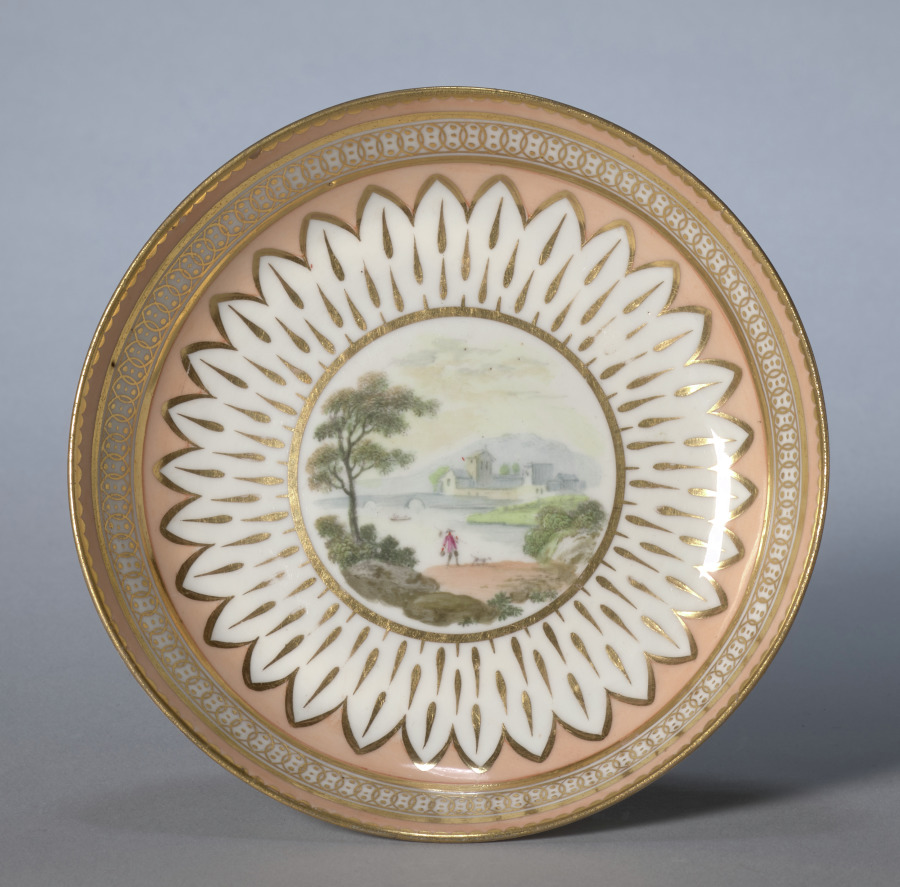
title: Saucer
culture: England, Derby, early 19th century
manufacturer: Derby (Crown Derby Period) (British)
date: c. 1800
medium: porcelain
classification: Ceramic